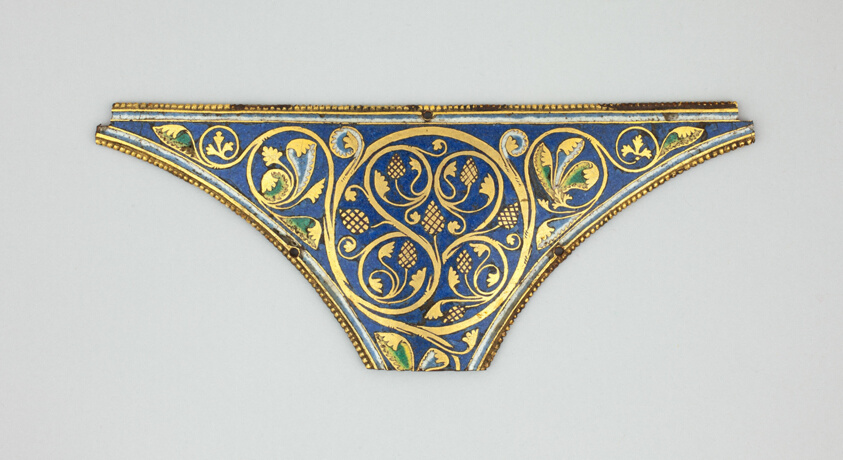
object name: Decorative Arts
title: Spandrel for a Reliquary Shrine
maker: German; Cologne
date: 1170/1180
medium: Gilt copper, champlevé enamel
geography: Cologne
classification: enamel; european decorative arts; decorative arts